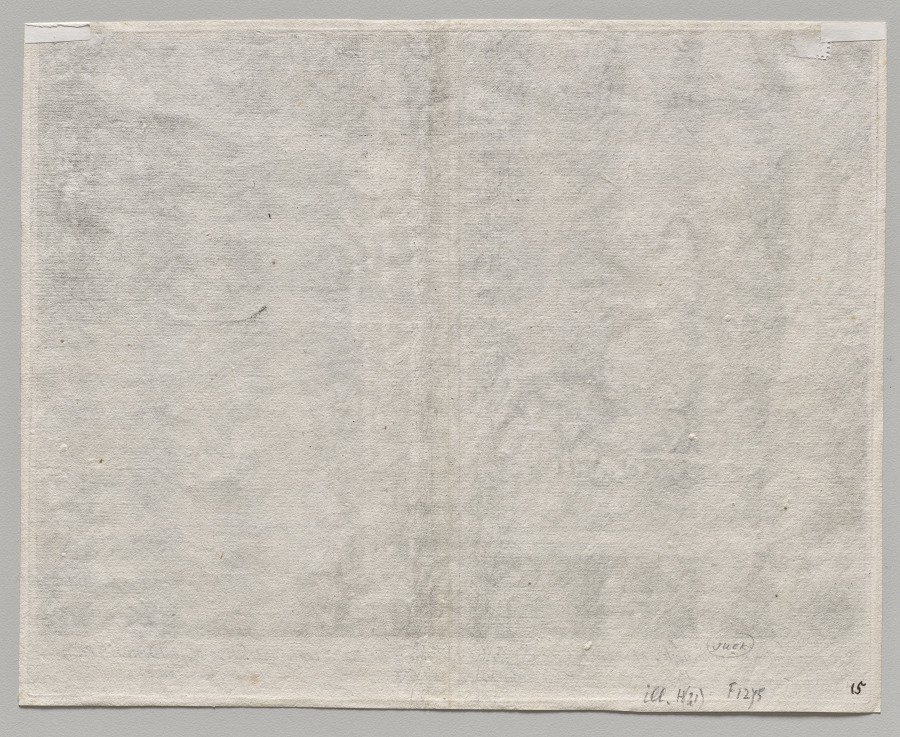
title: Seashore with a High Sea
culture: Netherlands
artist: Magdalena van de Passe (Dutch, 1595–1638)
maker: after Adam Willaerts (Dutch, 1577–1664)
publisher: Crispijn de Passe the Elder (Dutch, 1564–1637)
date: 1620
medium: engraving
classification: Print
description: Magdalena van de Passe is among a small number of female printmakers in the early modern period to have made a name for herself during her life. She likely knew the painter Adam Willaerts, who lived in the same town of Utrecht, since she made this engraving after one of Willaert’s coastal scenes. Van de Passe enhanced the scene by adding a figure depicting the Old Testament prophet Elijah emerging from a cave to listen to God, with engraved quotations from 1 Kings 17-19 beneath. Her meticulous engraving style, characterized by diminutive and somewhat irregular marks, is suited to the weather-worn scene, with its rocky outcrops, dramatic waterspout, and rolling hills.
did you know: Though the landscape depicted in this print is imaginary, the ship on the sea is a whaling vessel typical of Netherlandish manufacture of the 17th century.